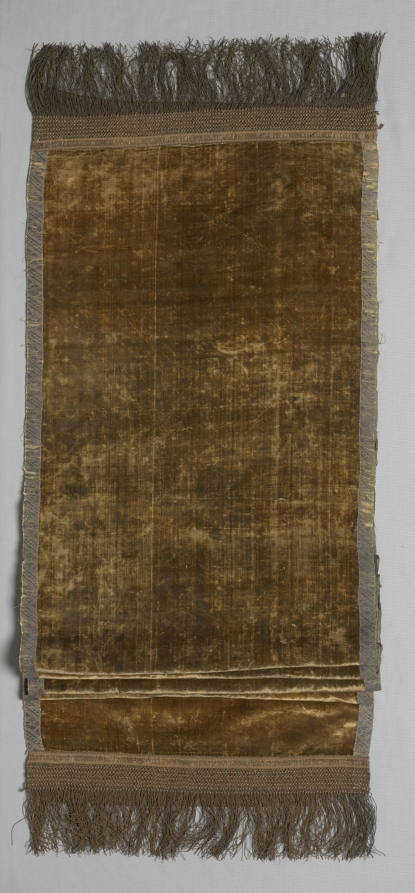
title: Length of Velvet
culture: Italy, 17th century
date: 1600s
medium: velvet; silk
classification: Velvet